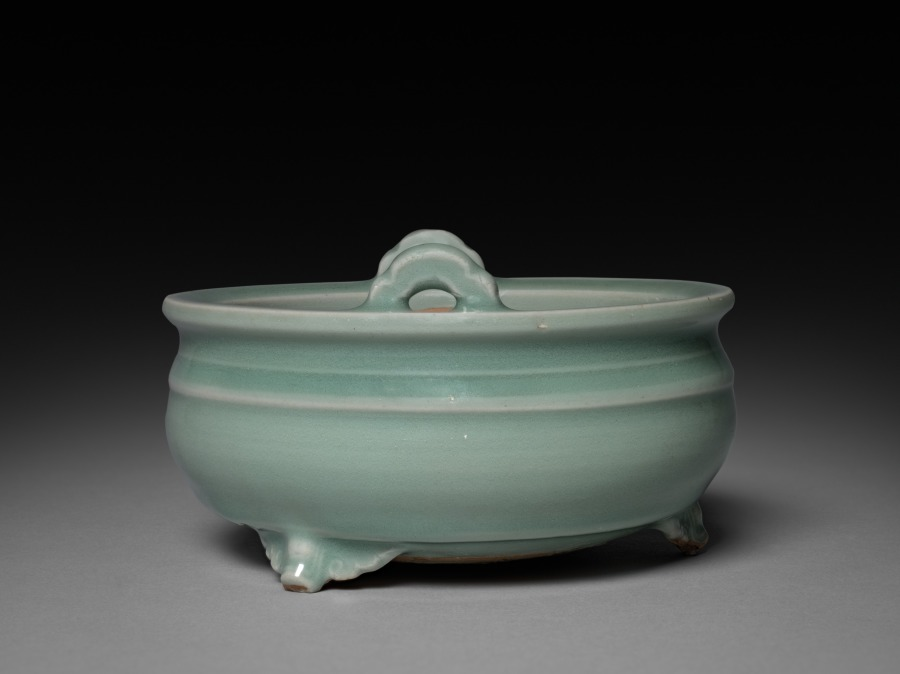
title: Incense Burner: Longquan Ware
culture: China, Southern Song dynasty (1127-1279)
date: S. Sung-Yuan Dynasty, 13th-14th Century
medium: glazed porcelain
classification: Ceramic